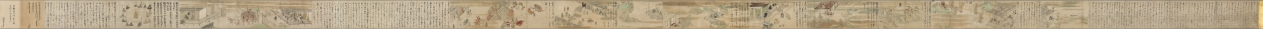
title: The Illustrated Miraculous Origins of the Yūzū Nenbutsu School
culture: Japan, Kamakura period (1185–1333)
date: early 1300s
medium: Handscroll; ink, color, and gold on paper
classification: Painting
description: This painting is the second of a set of two illustrated handscrolls. The first scroll depicts the biography of the Japanese Buddhist monk Ryōnin. This scroll begins with scenes of Ryōnin’s death and relates episodes illustrating the efficacy of following his teachings. Ryōnin asserted the total interconnectedness of all things and the spiritual benefit of chanting the name of the Buddha Amida for one another.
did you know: The other scroll from this two-scroll set belongs to the Art Institute of Chicago.